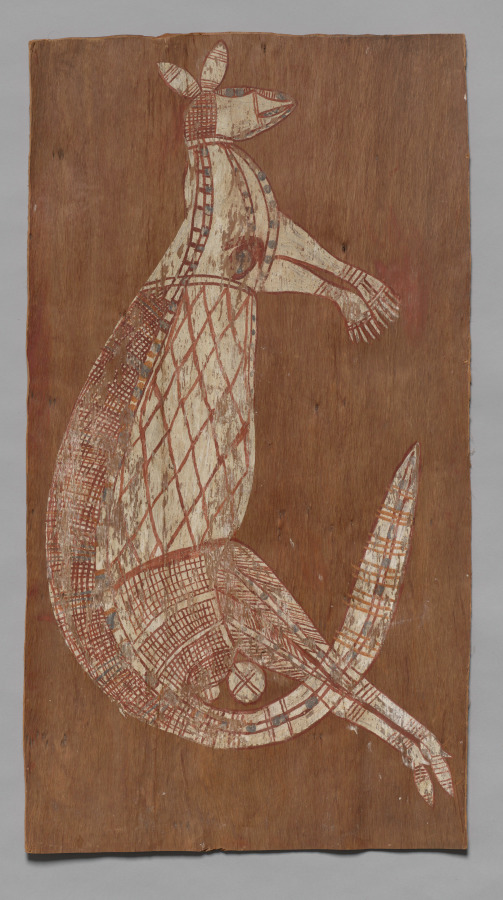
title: Kangaroo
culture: Australia, Western Arnhem Land, 20th century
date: 1900s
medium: tempera on bark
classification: Painting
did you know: Aboriginal artists made paintings on bark using symbols drawn from ceremonial body painting and rock paintings.